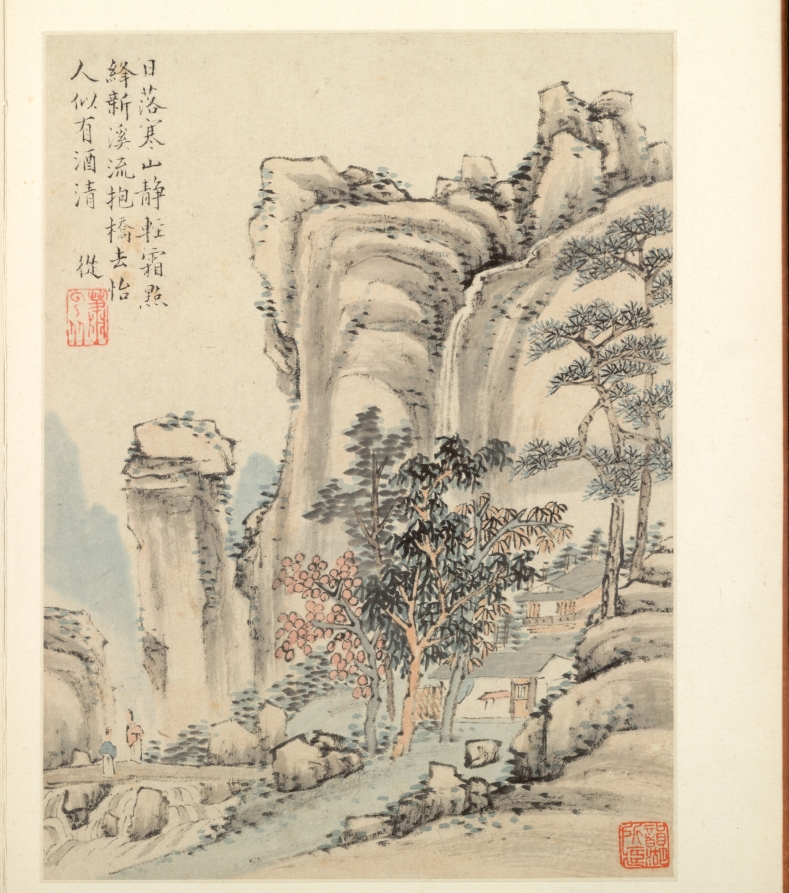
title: Album of Seasonal Landscapes, Leaf E (previous leaf 3)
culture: China, Qing dynasty (1644-1911)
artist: Xiao Yuncong (Chinese, 1596–1673)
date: 1668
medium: album leaf; ink and light color on paper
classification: Painting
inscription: Artist's inscription, signature, and 8 seals. Leaf C. In the setting sun, the cold mountain is quiet;/ Light frost dots the newly reddened leaves./ Rushing waters seem to embrace the bridge, then flow away;/ The water is as pleasing and clear as wine. Yuncong [seal] Xiao Yuncong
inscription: 9 additional seals: 2 of Chen Yixi 陳奕禧 (1646-1709); 4 of Li Yufen 李玉棻 [Li Yunhu 李韵湖] (active mid-1800s); 3 unidentified.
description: Throughout his lifetime, Xiao Yuncong visited Nanjing and Yangzhou, cities embedded in the fertile and water-rich Jiangnan region, as reflected in his paintings. Xiao painted from nature, and his landscapes are informed by the seasons and his travels, as well as by his experience as a print designer. Xiao’s fresh, light colors continue to appear in later Shanghai school paintings. This album was formerly in the collection of Li Yufen in Yangzhou and then owned by Wu Hufan in Shanghai. While the artist impressed his seal consistently below his poetic inscriptions in the upper parts of the composition, the red seals on the margins and in the lower corners of the paintings are impressions by the album’s previous owners.